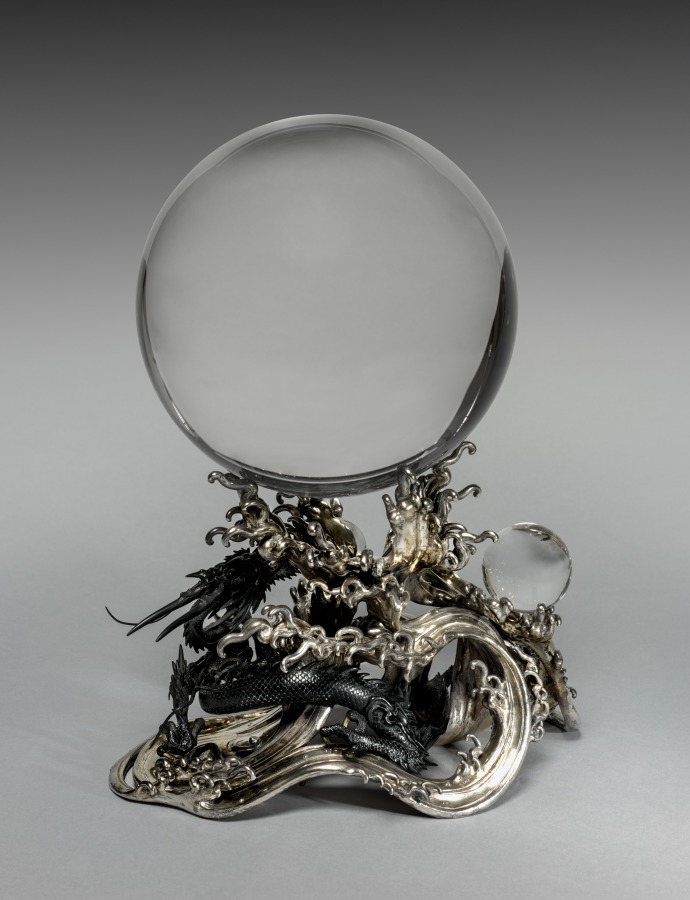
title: Tide-Changing Jewel with Dragon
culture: Japan, Meiji period (1868–1912)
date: early 1900s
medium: silver, shakudō (copper and gold alloy), and crystal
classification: Metalwork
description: An early Japanese legend describes a god of the sea who possesses two jewels responsible for controlling the ebb and flow of the tides. In other legends, the jewels belong to the Dragon King who rules from a palace beyond or beneath the sea. Tales received from China feature dragons that can generate rain by using pearls. This okimono (a small sculptural object without a function) mines imagery associated with these tales while aiming to appeal to the interest in gems and minerals embraced by some Americans and Europeans of the late 1800s and early 1900s.